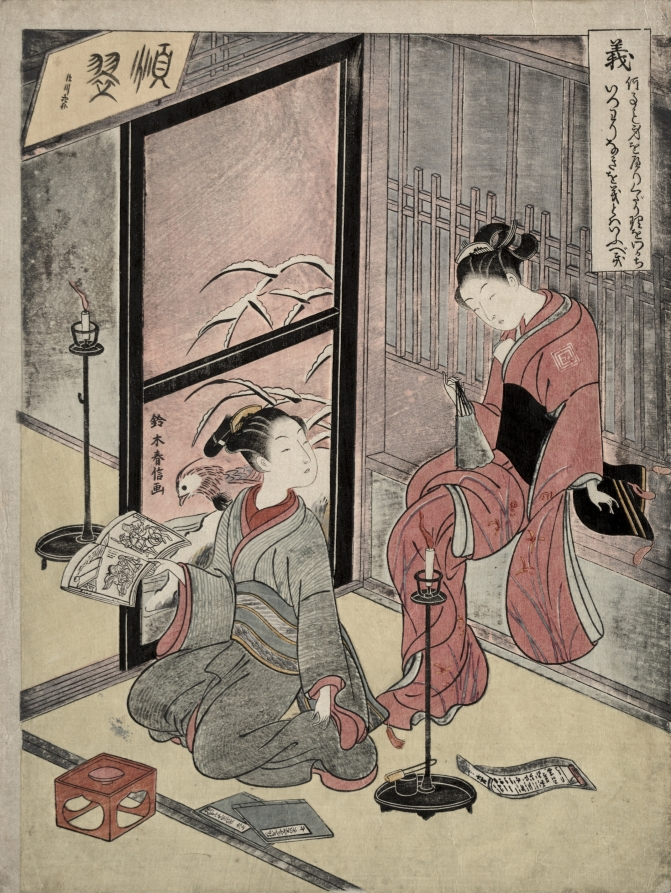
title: Righteousness, from The Five Virtues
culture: Japan, Edo period (1615–1868)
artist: Suzuki Harunobu (Japanese, 1724–1770)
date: 1767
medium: color woodblock print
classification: Print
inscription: 鈴木春信画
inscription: Nanigoto mo/ Mi o herikudari/ Ri o wakachi/ Itsuwari naki o/ Gi towa iu beki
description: Two young male courtesans enjoy reading in their quarters by candlelight. One holds an illustrated book recognizable as the drawing manual Illustrated Book of the Treasure-Bag of Sketches (絵本写宝袋), published in 1720 by Tachibana Morikuni (1679–1748). The poem at the top translates as follows: In all things to be humble, discern the path of reason, and abstain from falsehood. This is what we call righteousness.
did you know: The artist's signature is on the door painted with a mandarin drake in a snowy scene.